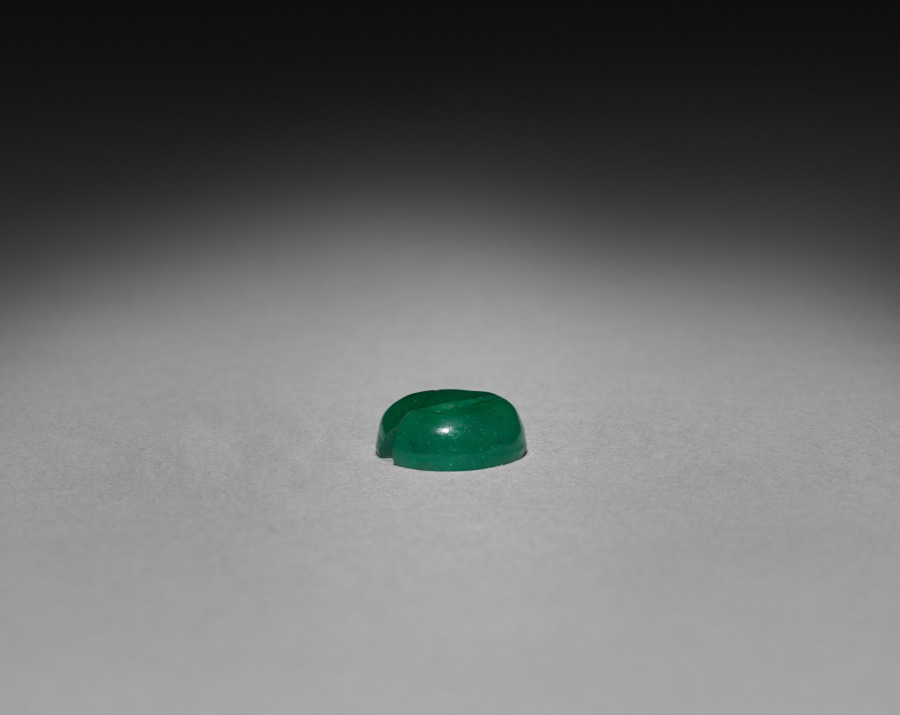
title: Snuff Bottle (stopper)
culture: China, Qing dynasty (1644-1911)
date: 1644–1911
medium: glass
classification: Glass